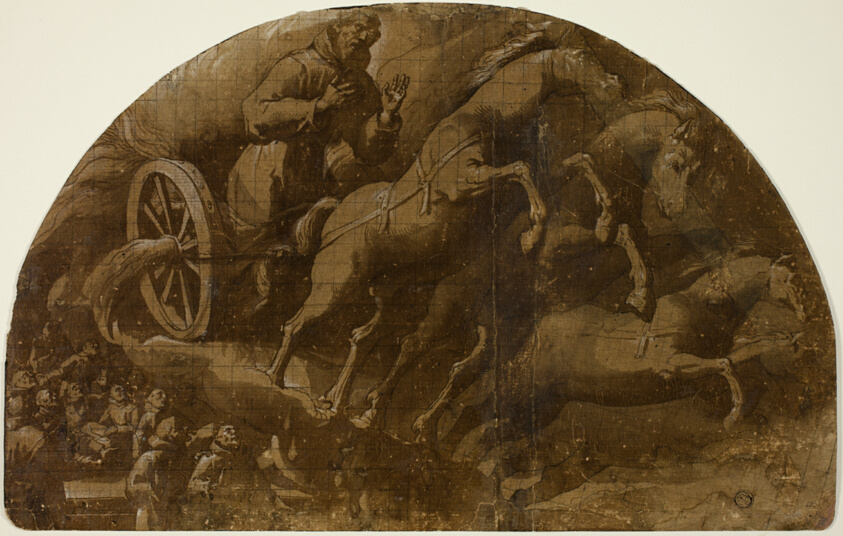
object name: Drawing and Watercolor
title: Study for the Vision of Saint Francis of Assisi Taken to Heaven in a Fiery Chariot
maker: Jacopo Ligozzi (Italian, 1547-1627)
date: 1600/02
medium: Pen and brown ink with brush and brown wash, heightened with lead white, on lunette-shaped brown laid paper, squared in black chalk, laid down on card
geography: Italy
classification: ink with wash; drawings (visual works); prints and drawing